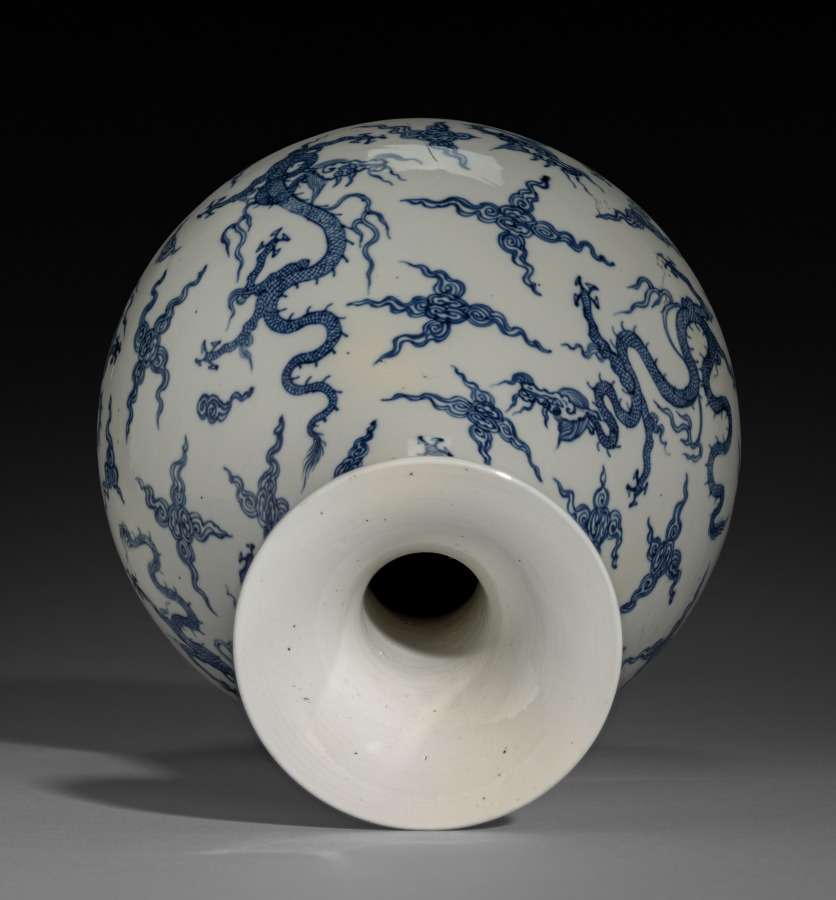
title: Bottle Vase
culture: China, Jiangxi province, Jingdezhen kilns, Qing dynasty (1644-1911), Yongzheng reign (1723-35)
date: 1723–35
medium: porcelain with underglaze blue decoration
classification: Ceramic